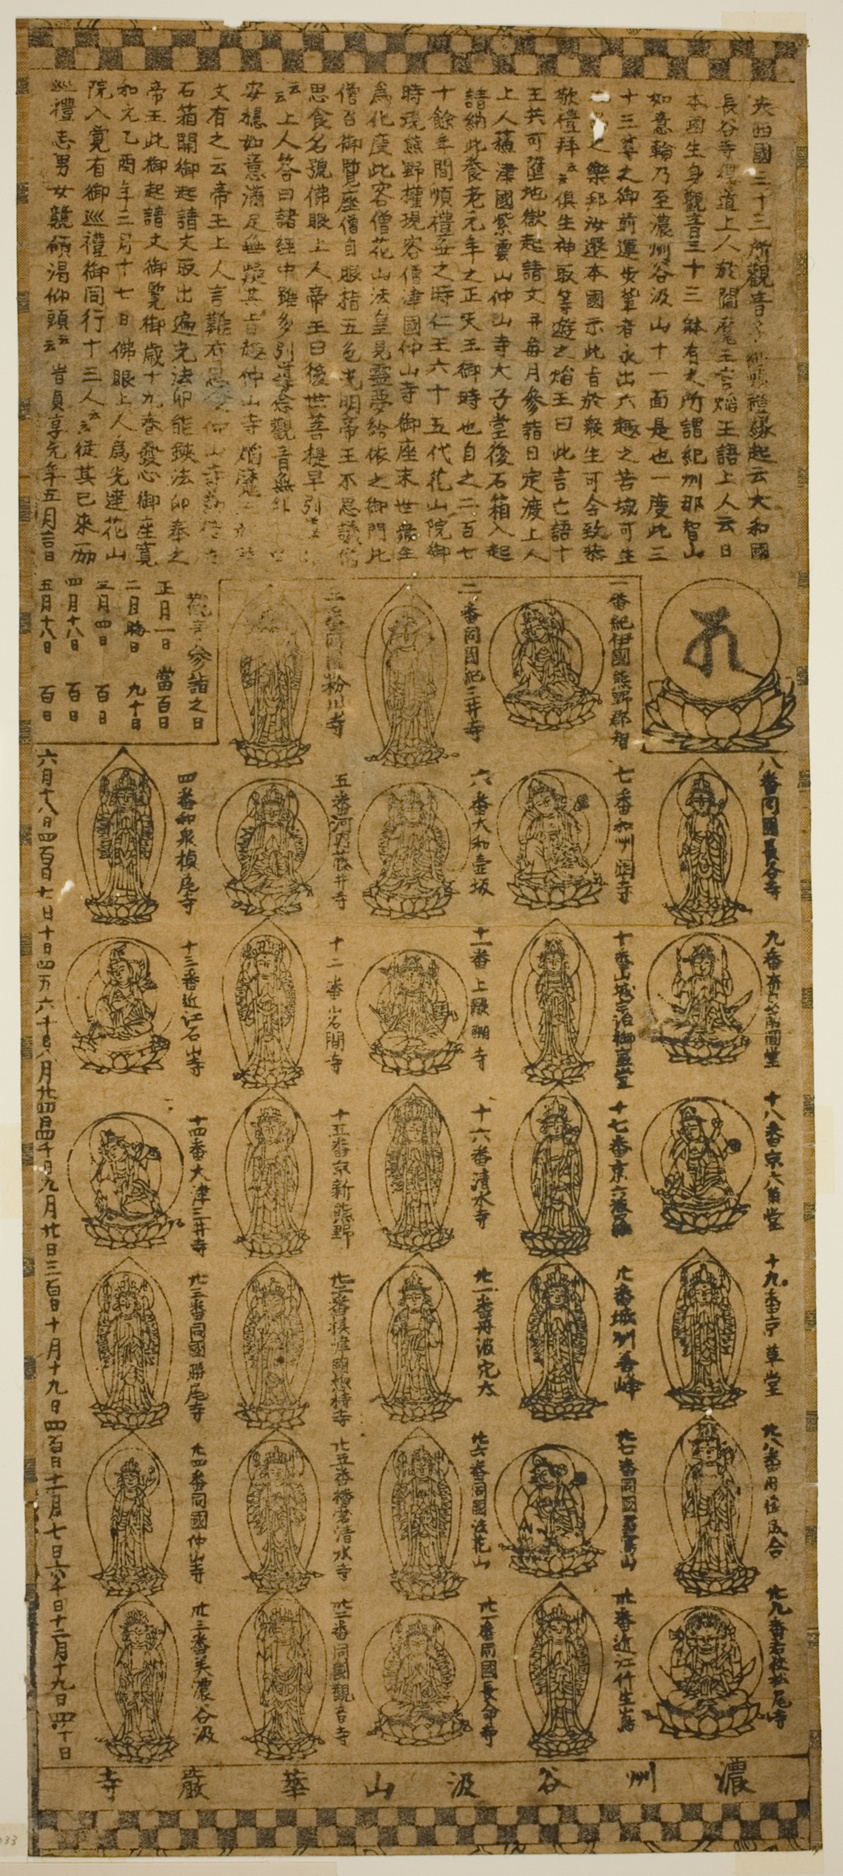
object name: Print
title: Charm from Tanigumisan Kegonji Temple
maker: Japanese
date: 1684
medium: Woodblock print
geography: Japan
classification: woodblock print; print; asian art